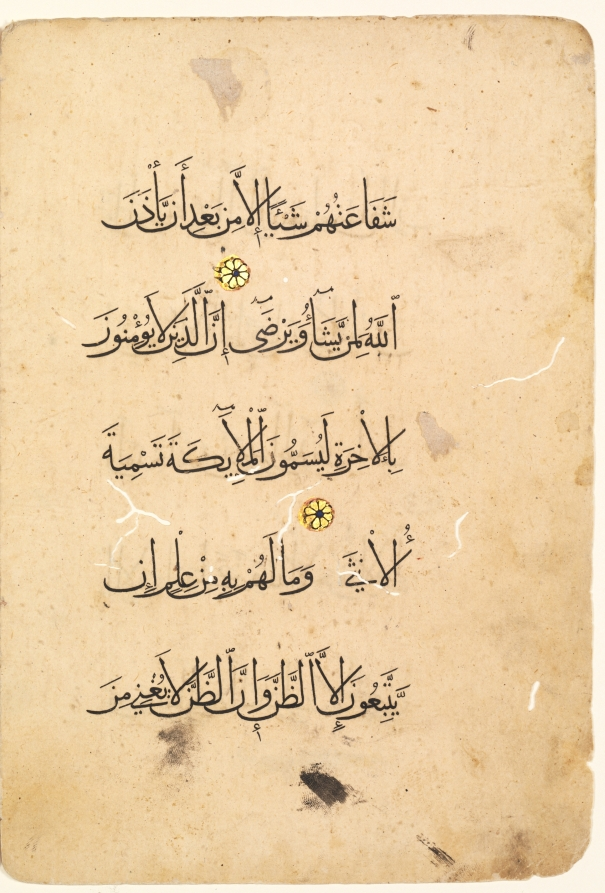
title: Qur'an Manuscript Folio. Left Folio of a Bifolio (verso)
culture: Egypt, Mamluk sultanate (1250–1517)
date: 1300s–1400s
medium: ink, gold, and colors on paper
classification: Drawing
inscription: Sura al-Najm [Chapter:The Stars] 53: part 26-part 28 (Arabic) Script: Muhaqqaq (five lines to a page)